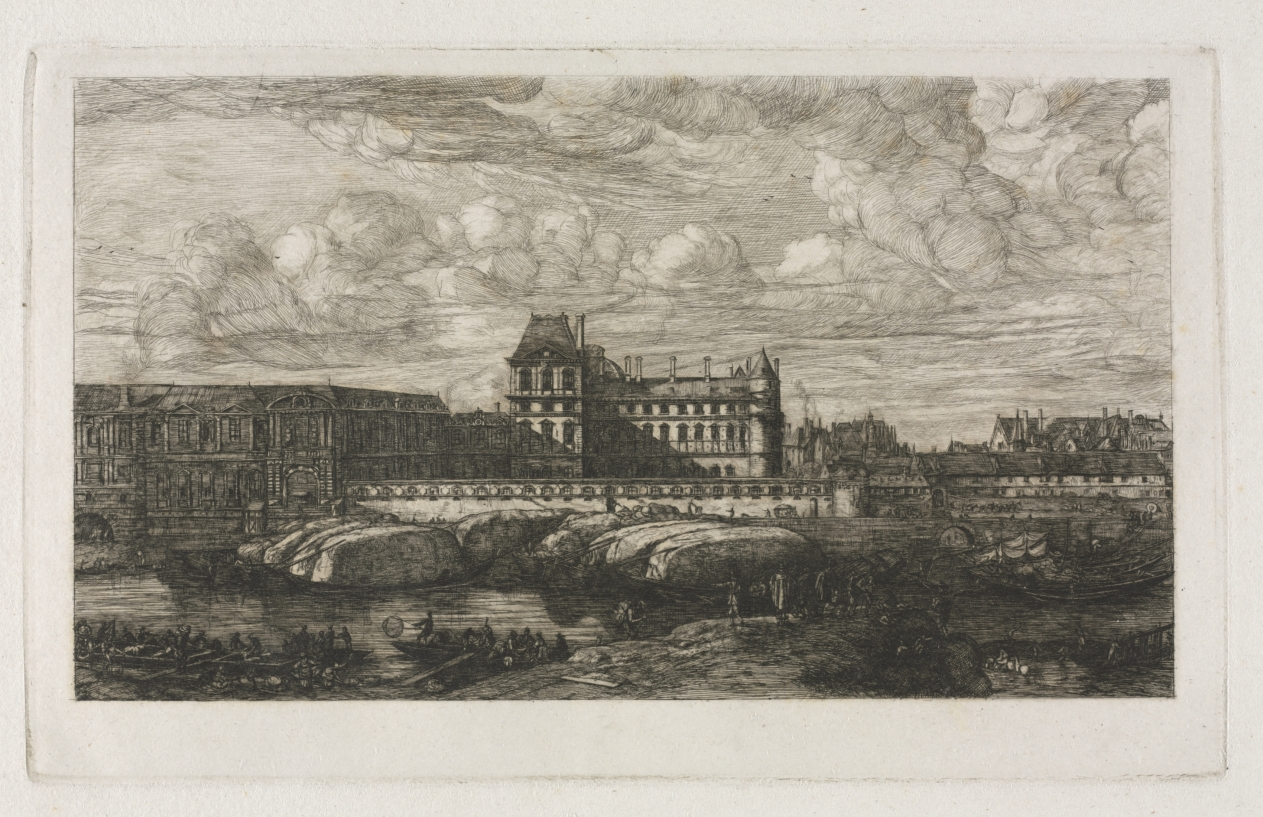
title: The Old Louvre from a Painting by Zeeman, 1651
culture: France, 19th century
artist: Charles Meryon (French, 1821–1868)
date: 1866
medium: etching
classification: Print